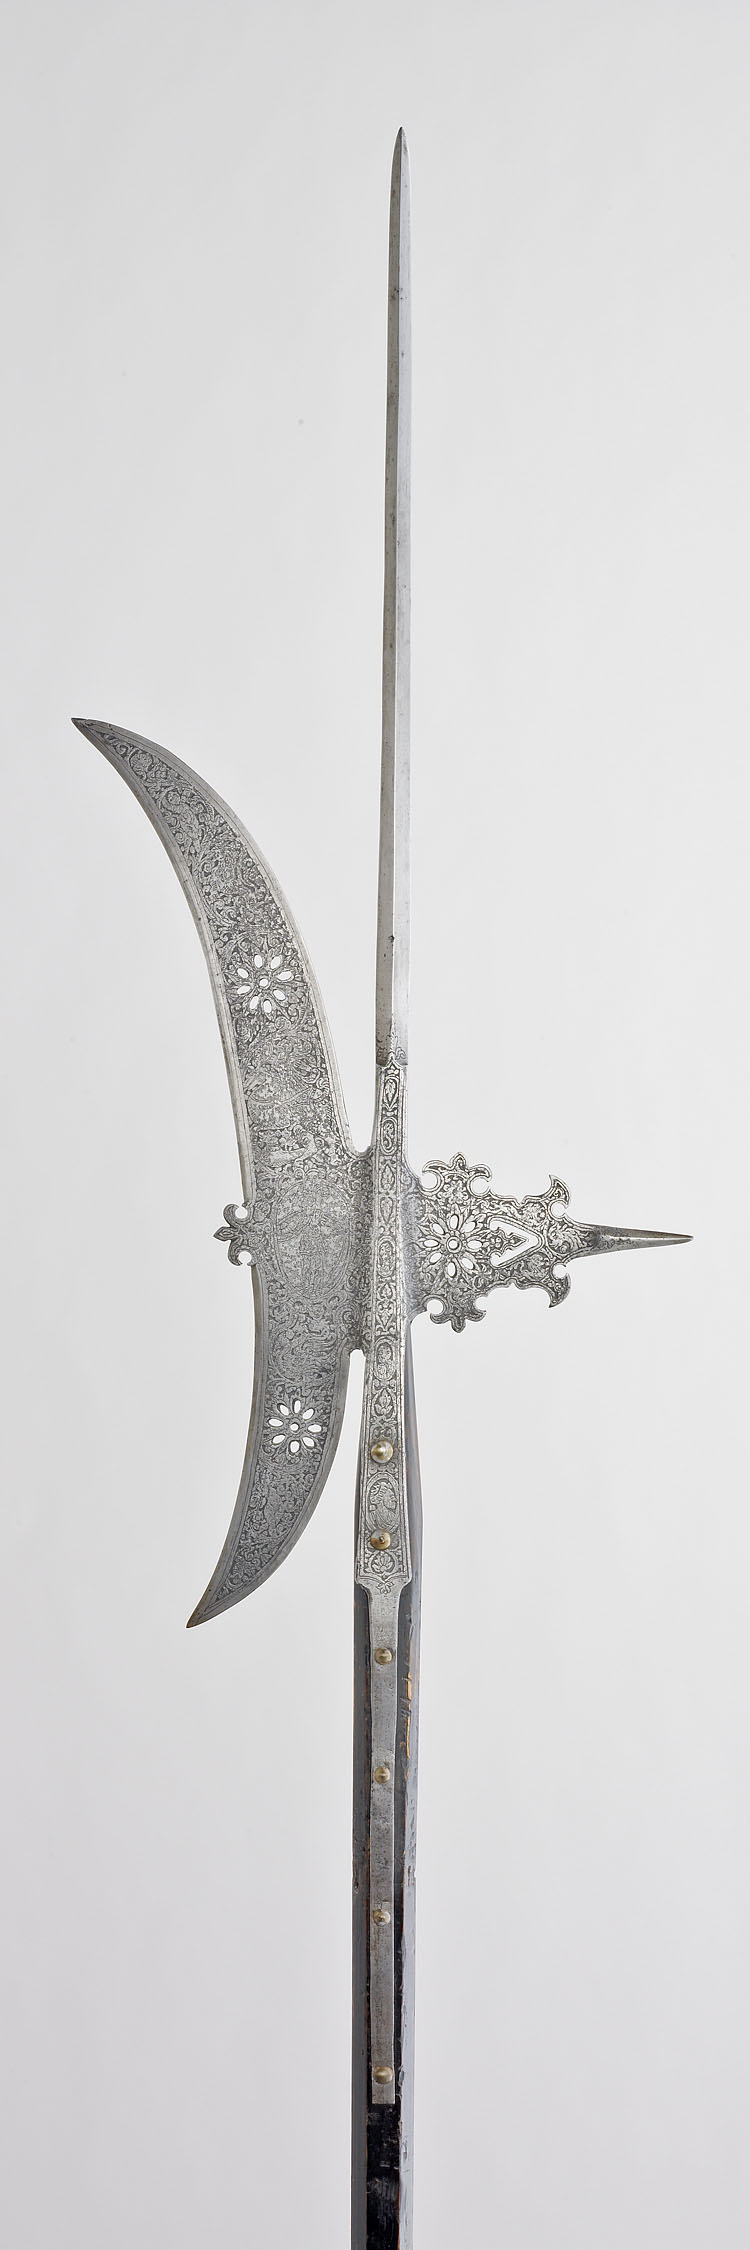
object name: Arms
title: Halberd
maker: Italian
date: 1590/1600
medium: Steel, iron, and wood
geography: Central Italy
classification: edged weapon-staff; arms; arms and armor